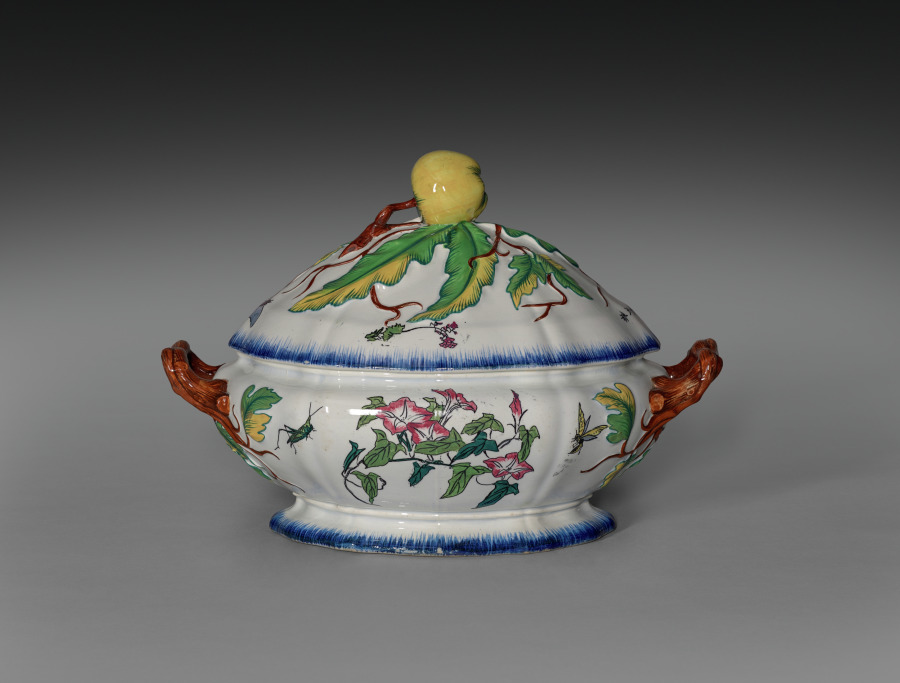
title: Covered Tureen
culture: France, Creil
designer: Félix Bracquemond (French, 1833–1914)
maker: Creil Factory (French)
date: 1866–75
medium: porcelain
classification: Ceramic